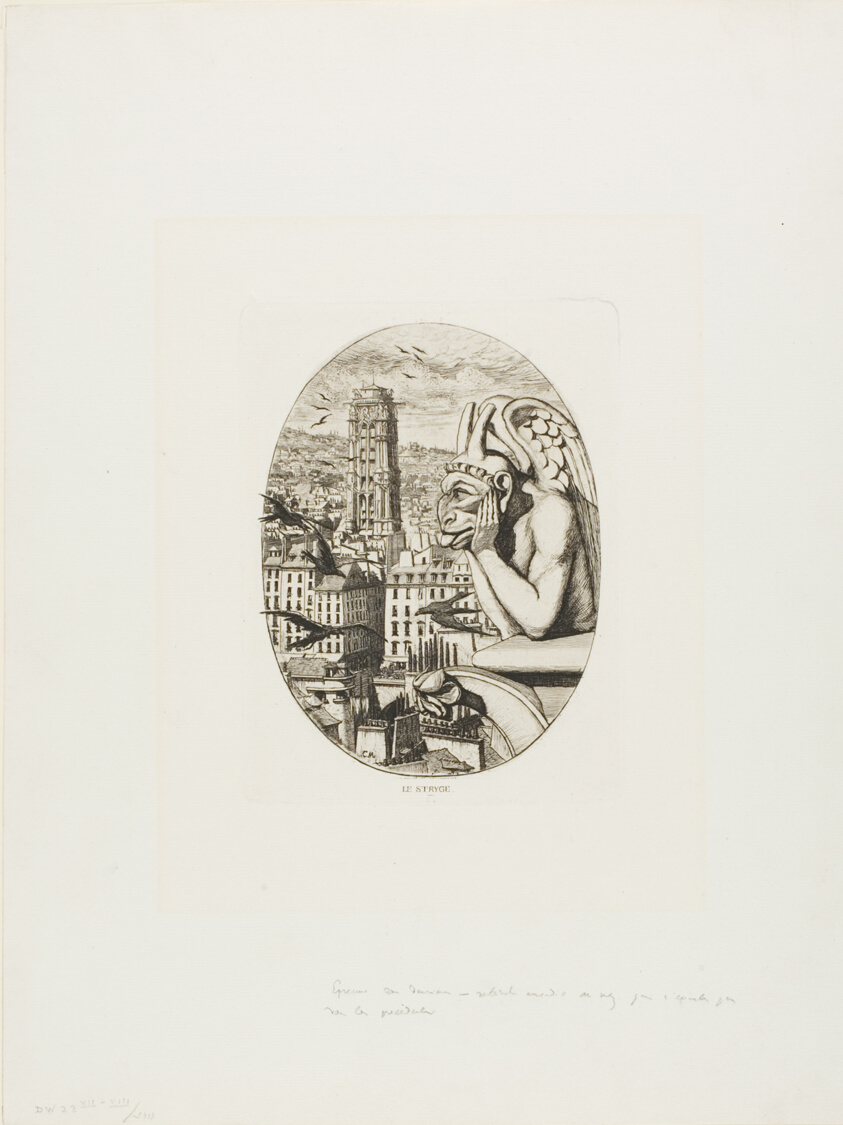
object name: Print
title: The Vampire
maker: Charles Meryon (French, 1821-1868); printed by Auguste Delâtre (French, 1822-1907)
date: 1853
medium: Etching and drypoint on ivory laid paper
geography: France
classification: etching; print; prints and drawing